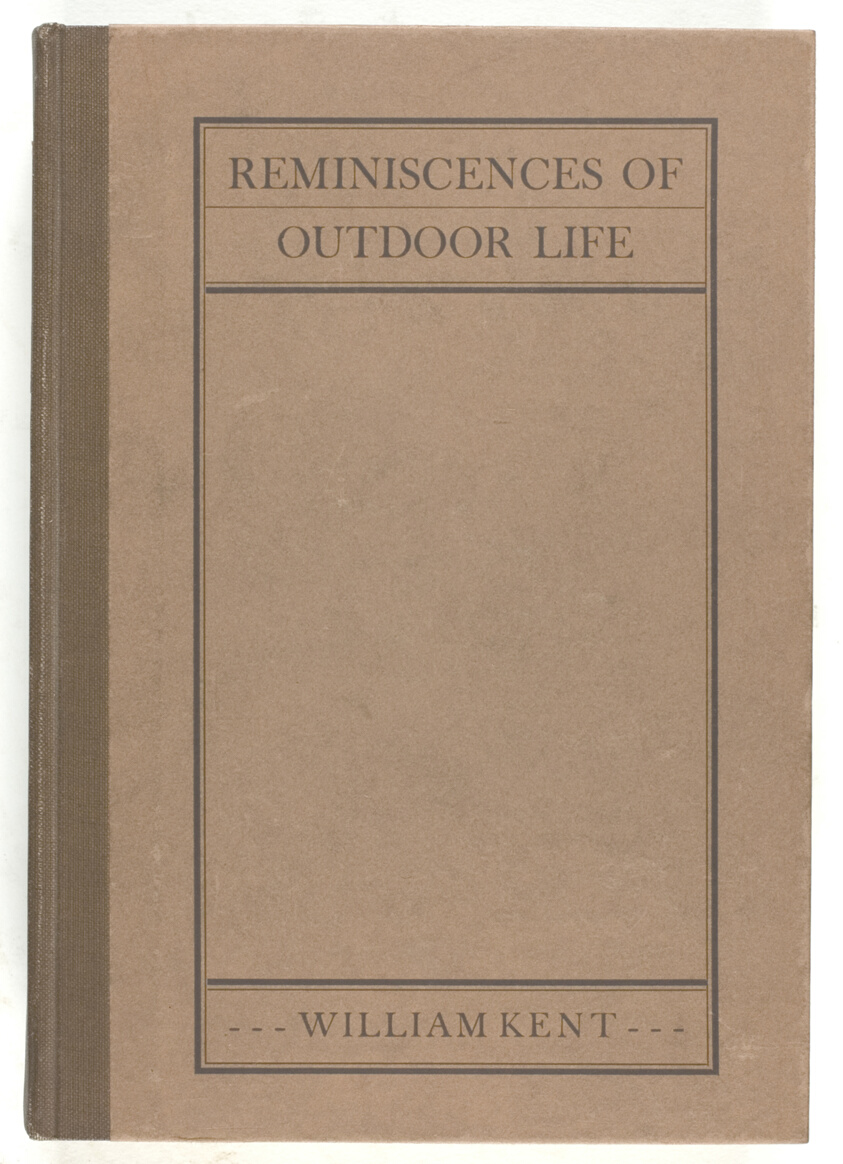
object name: Photograph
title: Reminiscences of Outdoor Life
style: 19th century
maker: William Kent (English, 1685–1748)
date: 1865/95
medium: Offset lithograph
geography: England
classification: photography; halftone; photomechanical process; photograph